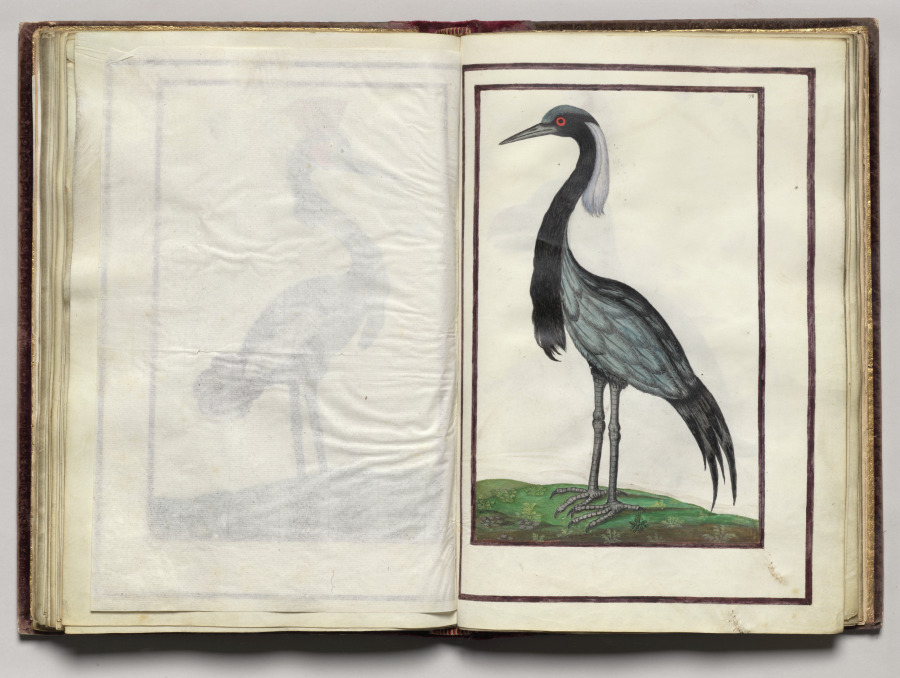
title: Heron, folio 36 (recto), from Florilegium (A Book of Flower Studies)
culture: France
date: 1608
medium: watercolor, ink, silver, and gold over occasional traces of pencil, on vellum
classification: Bound Volume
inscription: Dated: Poitiers 1608 (on frontispiece) Signed: On frontispiece in black ink, lower right: Van Kuyk Notation on drawing: Frontispiece: in pencil, lower margin: * élève de Van Kessel, peintre flammand (* in pencil also appears in front of Van Kuyk's name).